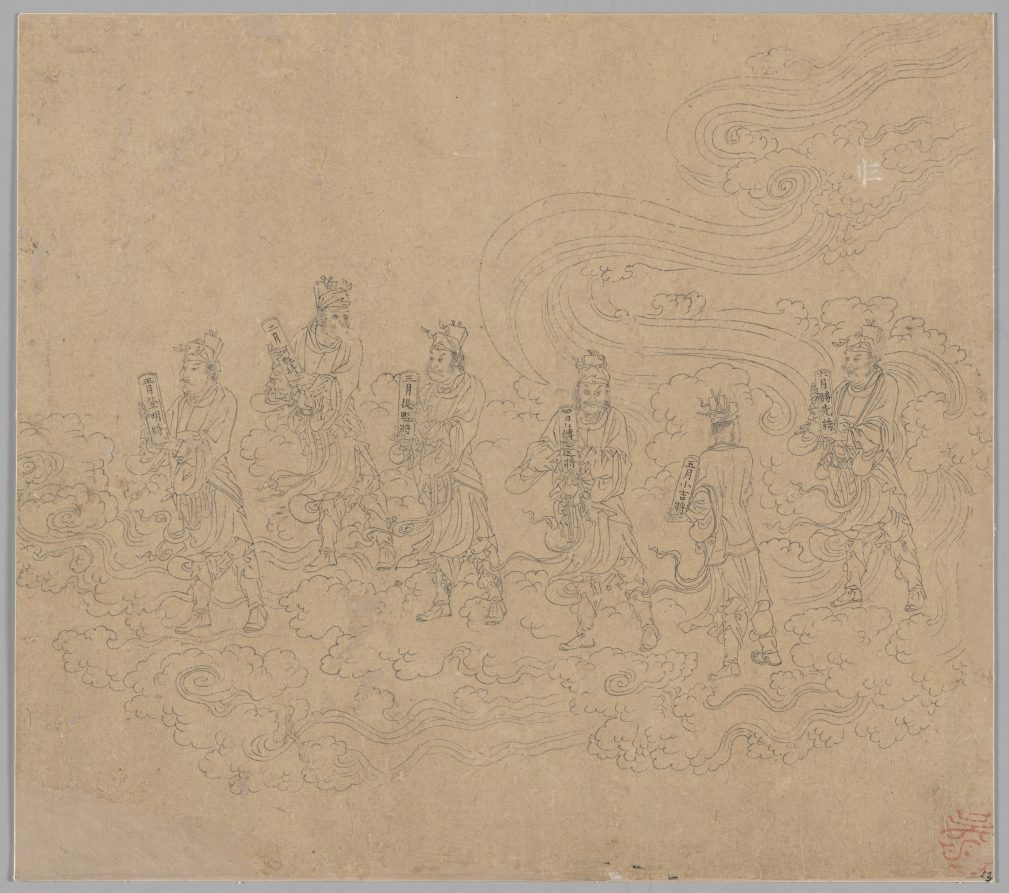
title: Album of Daoist and Buddhist Themes: Procession of Daoist Deities: Leaf 23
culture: China, Southern Song dynasty (1127-1279)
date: 1200s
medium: Album, ink on paper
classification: Painting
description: These six Daoist deities all carry plaques inscribed with their names. This group of six is the first set of half-officers, ranging from the first to the sixth month of the cycle. Album leaf 24 continues the series with the officers for the seventh through the twelfth months.